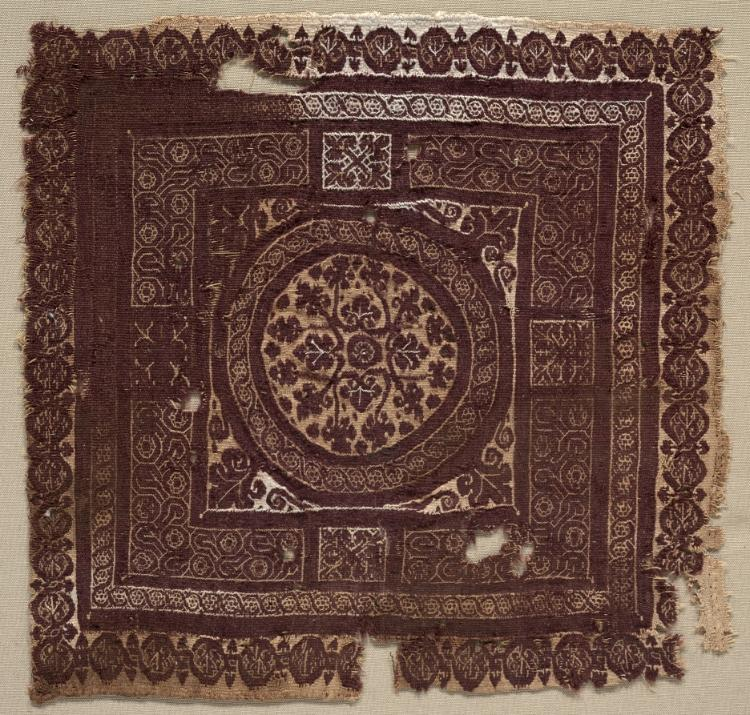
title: Ornament from a Garment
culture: Egypt, Byzantine period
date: 400s–600s CE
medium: Linen, undyed; wool, dyed; tapestry weave with supplementary weft wrapping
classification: Textile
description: Six different designs of leaves and interlacing lines are organized harmoniously here within circles, triangles, and squares. Originally part of a garment, interlacing knot designs were thought to symbolically protect the wearer from harm.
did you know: The purple color was achieved using red dye made of madder and blue from the indigo plant.